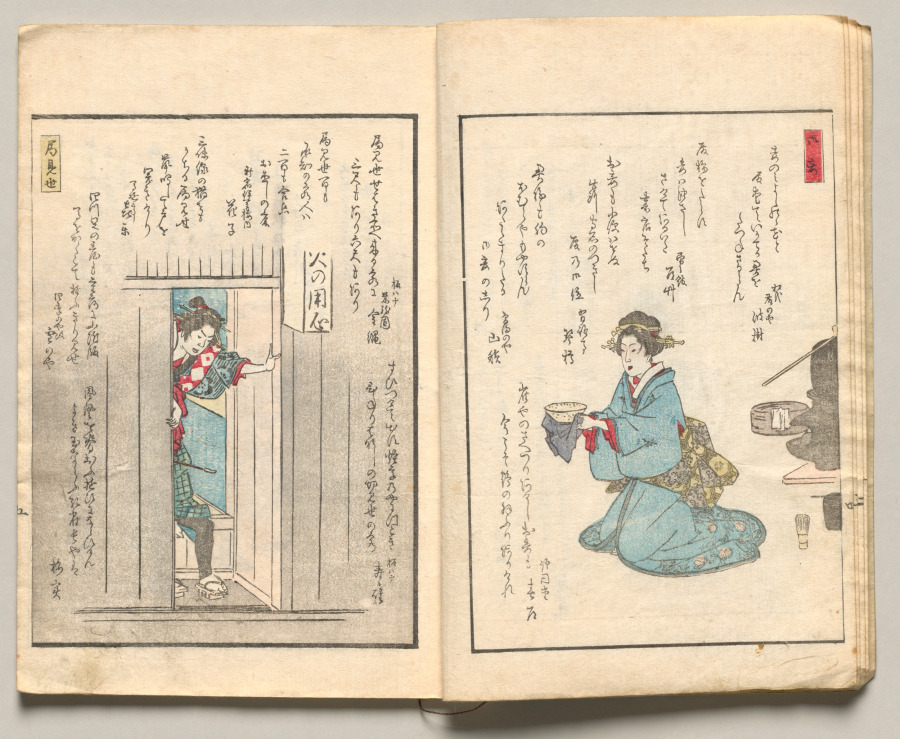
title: Spread Five from Volume Five of People of Japan in Light Verse (Kyōka)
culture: Japan, Edo period (1615–1868)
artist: Utagawa Hiroshige (Japanese, 1797–1858)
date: 1857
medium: Woodblock-printed book; ink and color on paper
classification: Bound Volume